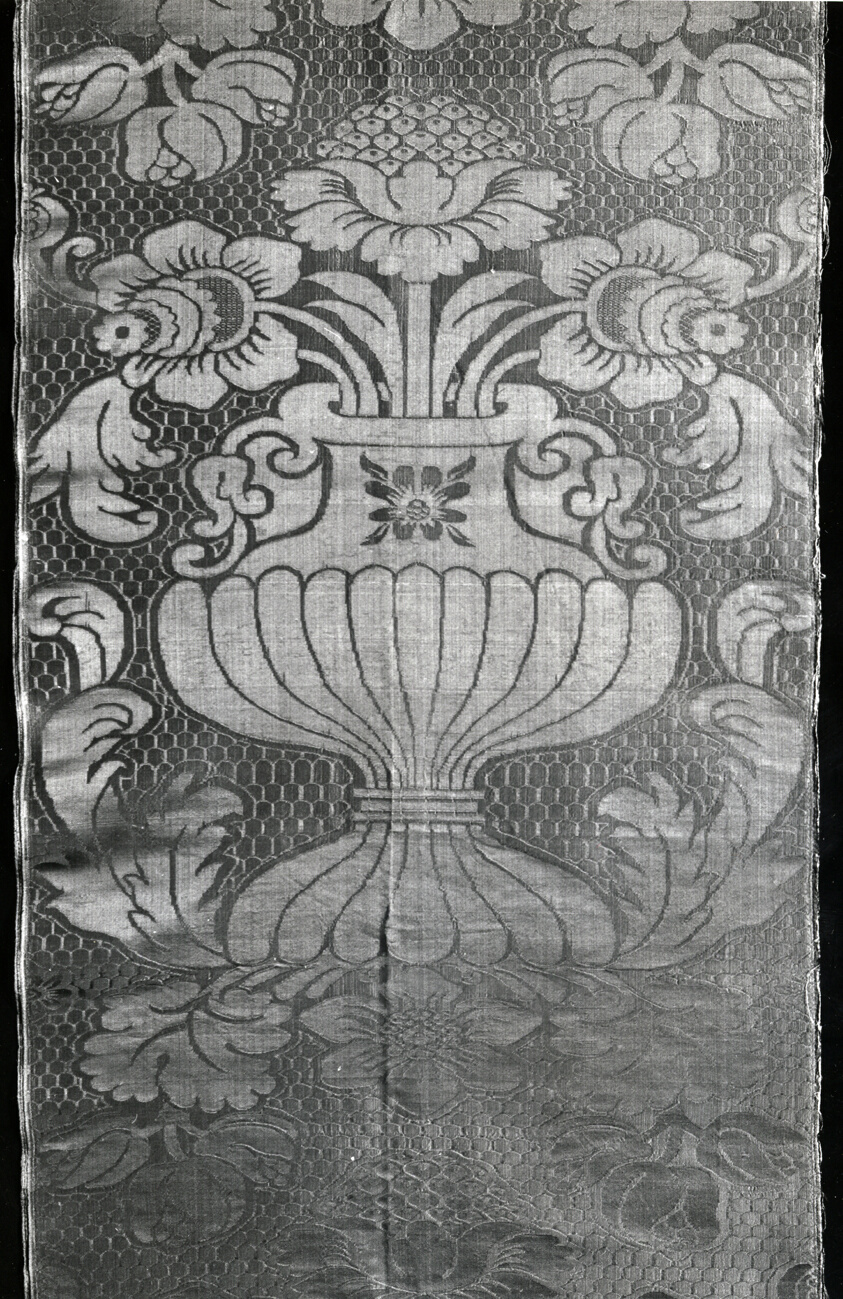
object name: Textile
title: Panel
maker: Spain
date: 17th century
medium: Silk, satin weave self-patterned by reversing of faces (satin damask)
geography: Spain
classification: textile; weaving